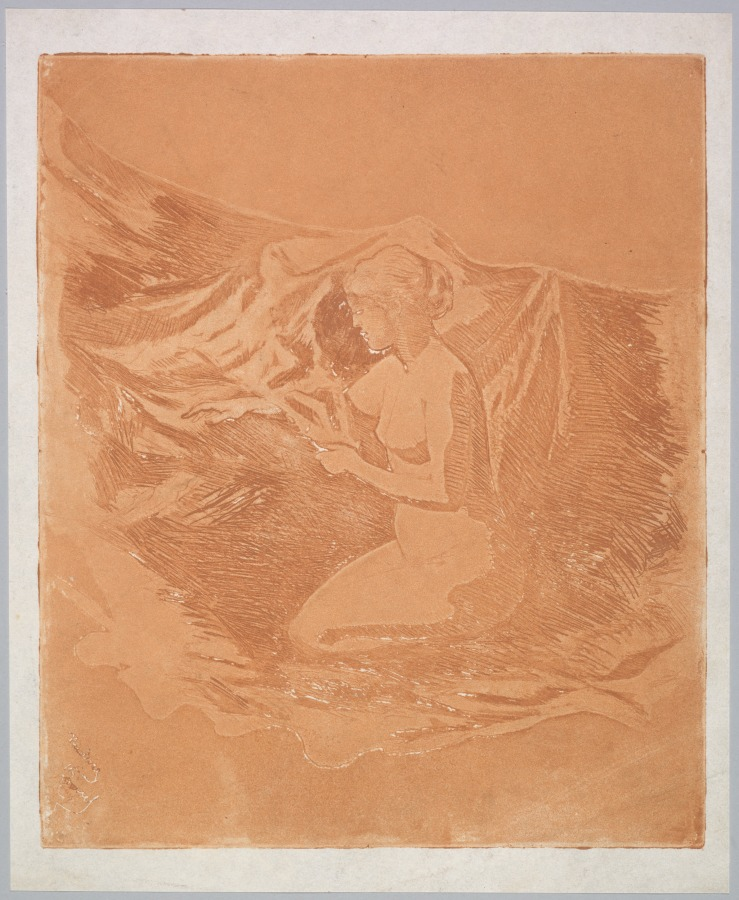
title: Embers Glow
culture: France, 19th century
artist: Theodore Roussel (French, 1847–1926)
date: 1890–1897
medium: color etching and aquatint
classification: Print